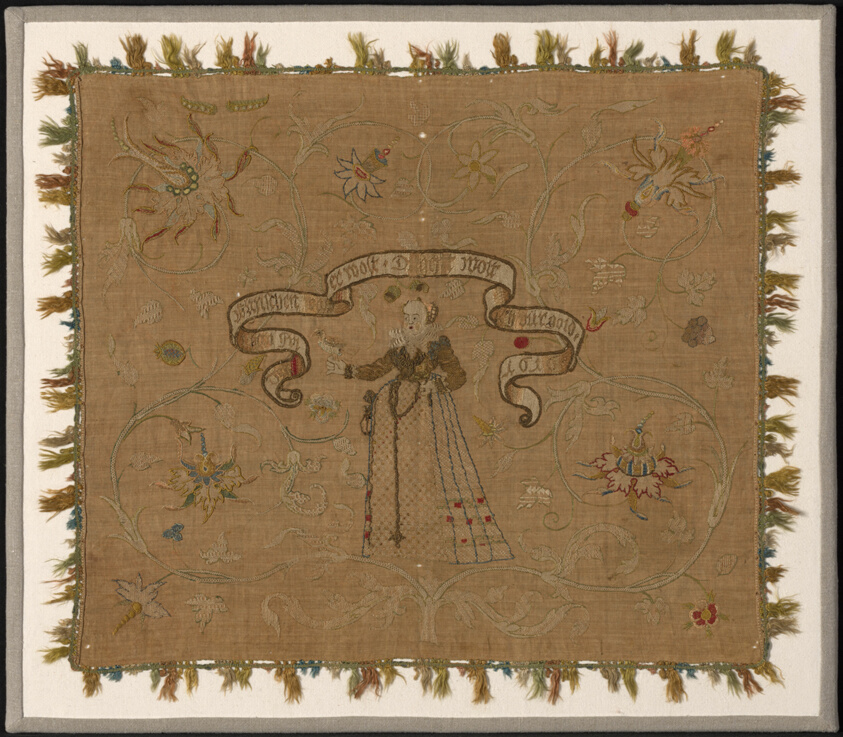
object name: Textile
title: Picture (Needlepoint)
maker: Switzerland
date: 1616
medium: Linen, plain weave; embroidered with silk floss, linen yarns, and gilt-metal-strip-wrapped silk in bullion, buttonhole, detached buttonhole, chain, cross, half cross, long-armed cross, overcast, satin, and threaded herringbone stitches; laid work, couching, and buttonhole couching; edged with silk, plain weave with extended ground weft fringe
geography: Switzerland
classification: textile; needlework (visual works)